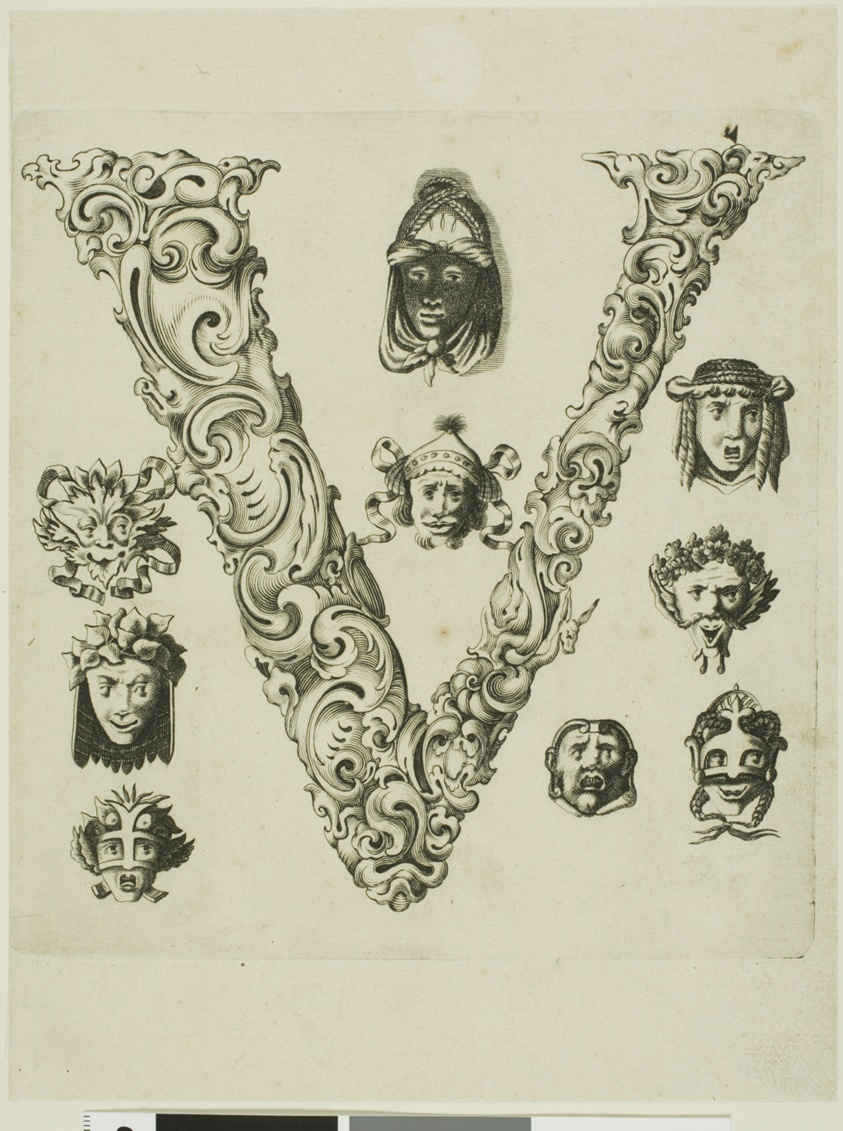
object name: Print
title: Letter V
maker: Peter Aubry (German, 1596-1668)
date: 1630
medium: Engraving on paper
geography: Germany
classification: engraving; print; prints and drawing